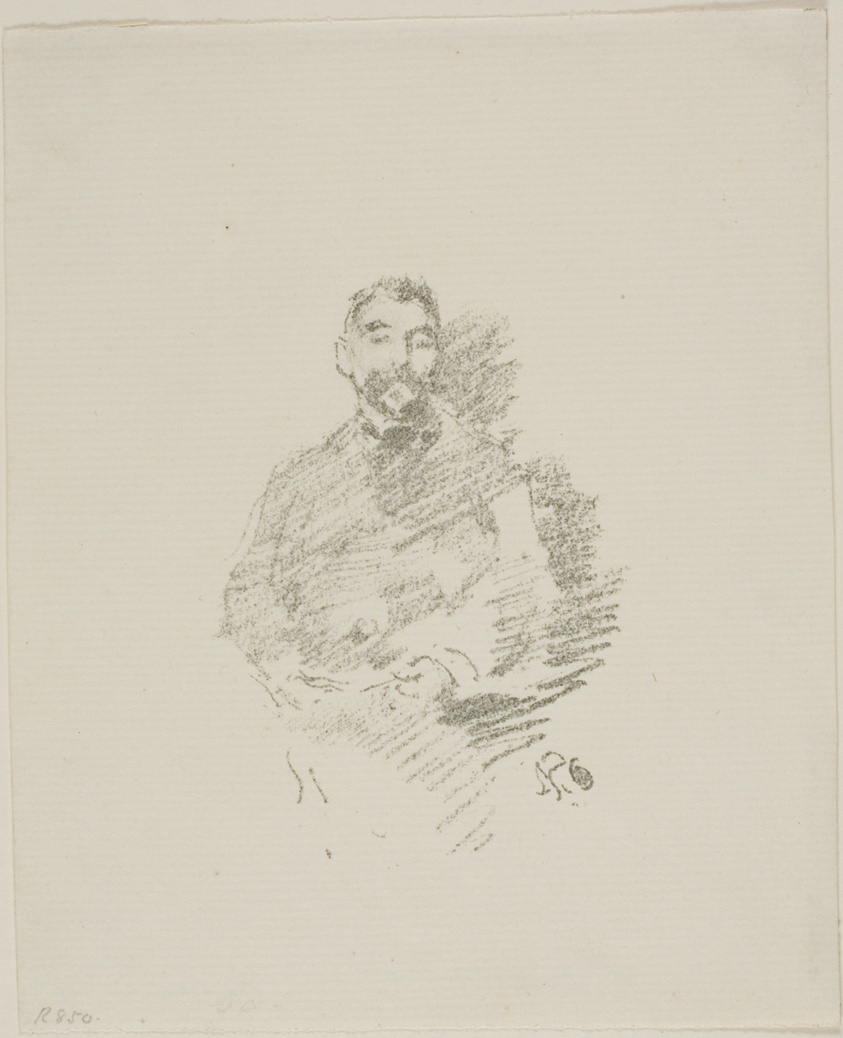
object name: Print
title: Stéphane Mallarmé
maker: James McNeill Whistler (American, 1834-1903)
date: 1892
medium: Transfer lithograph in gray-black on ivory laid paper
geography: United States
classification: transfer lithograph; lithograph; print; prints and drawing; paper